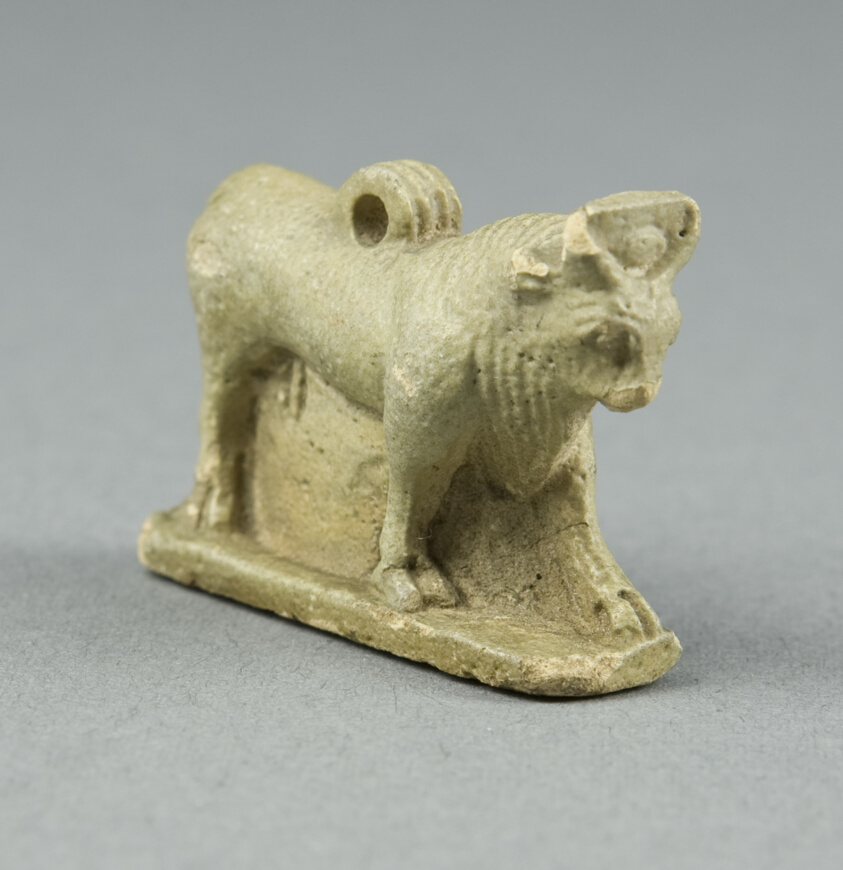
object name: Costume and Accessories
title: Amulet of the Apis Bull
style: egyptian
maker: Egyptian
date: Late Period, Dynasties 26–31 (664–332 BCE)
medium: Faience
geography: Egypt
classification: amulet; jewelry; ceramics; ancient art; costume; faïence (composite material)